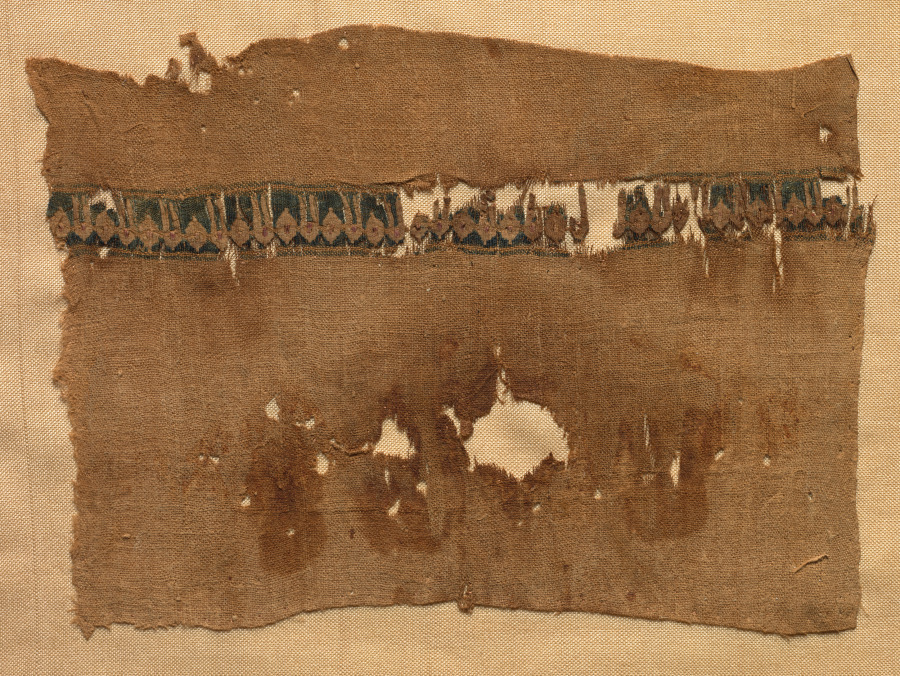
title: Fragment of a Tiraz-Style Textile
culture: Egypt, Fatimid period, Caliphate of of al-Mustansir, AH 475-487, 11th Century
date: 1081 – 1094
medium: tabby ground with inwoven tapestry ornament; linen and silk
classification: Textile